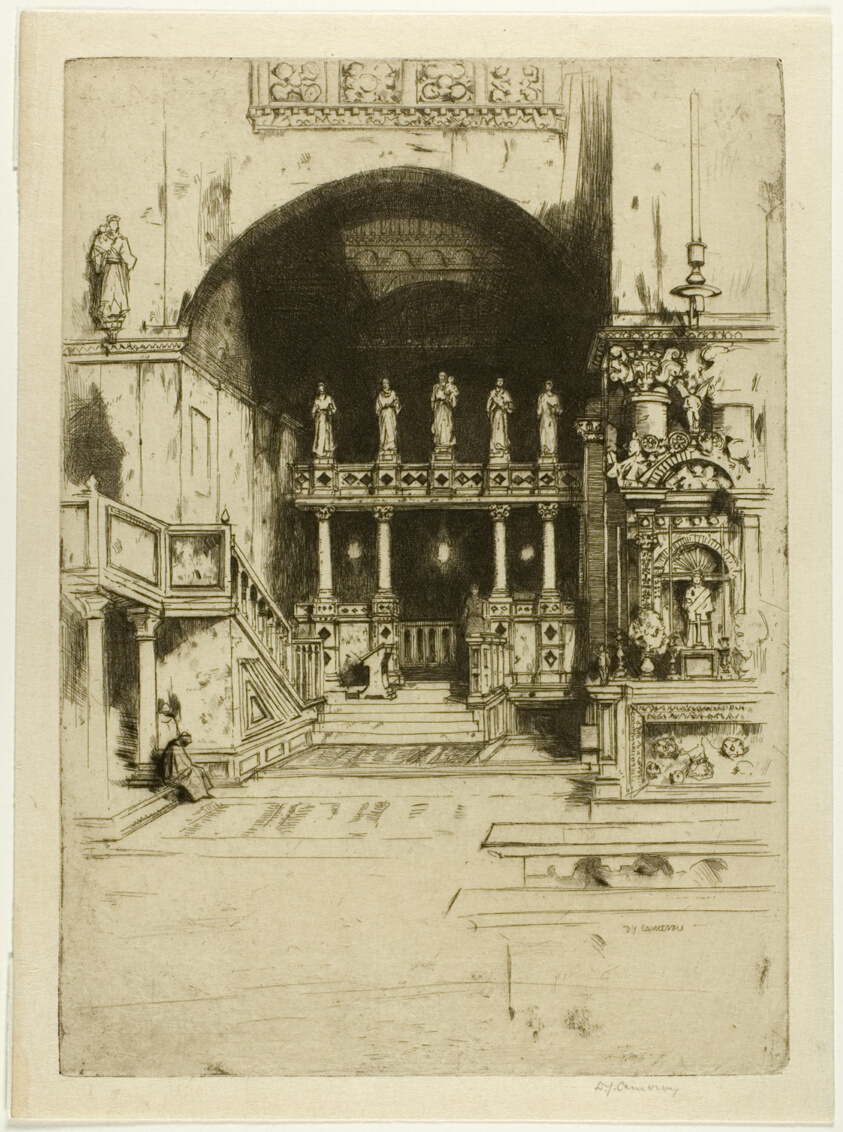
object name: Print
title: Saint Mark's, No. 3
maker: David Young Cameron (Scottish, 1865-1945)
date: 1900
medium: Etching and drypoint on cream laid paper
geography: Scotland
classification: etching; print; prints and drawing